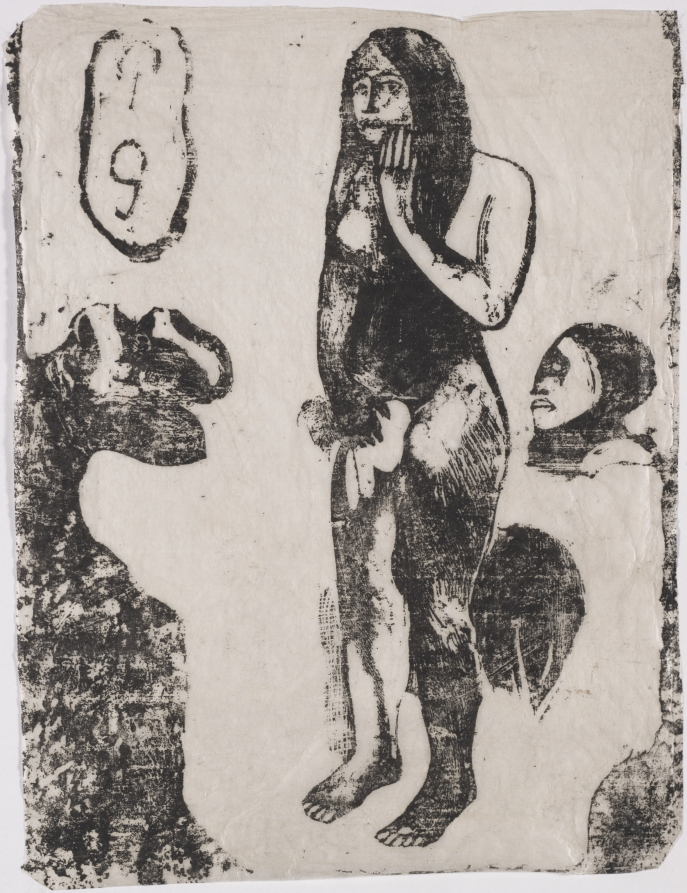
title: Eve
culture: France, 19th century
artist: Paul Gauguin (French, 1848–1903)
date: 1898–99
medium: woodcut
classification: Print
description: In his quest to reconcile the Gospels of the New Testament with the spirit of modern science, Gauguin created 14 woodcuts that mix Christian and Polynesian imagery to create the visual equivalents of parables or fables. Here, Eve’s gesture of modesty recalls earlier representations of her expulsion from the Garden of Eden, but the disembodied hooded head, the tupapau (a Tahitian evil spirit), and the rat (the shadow of a ghost) are Polynesian symbols. Combining Eve, an image of guilt and violation, with Tahitian symbols of death increases the potency of the scene. This special impression of Eve is the only known example of the first state in which the black shape in the lower right is blank, before the block was changed; additional white lines appear on Eve and the rat.